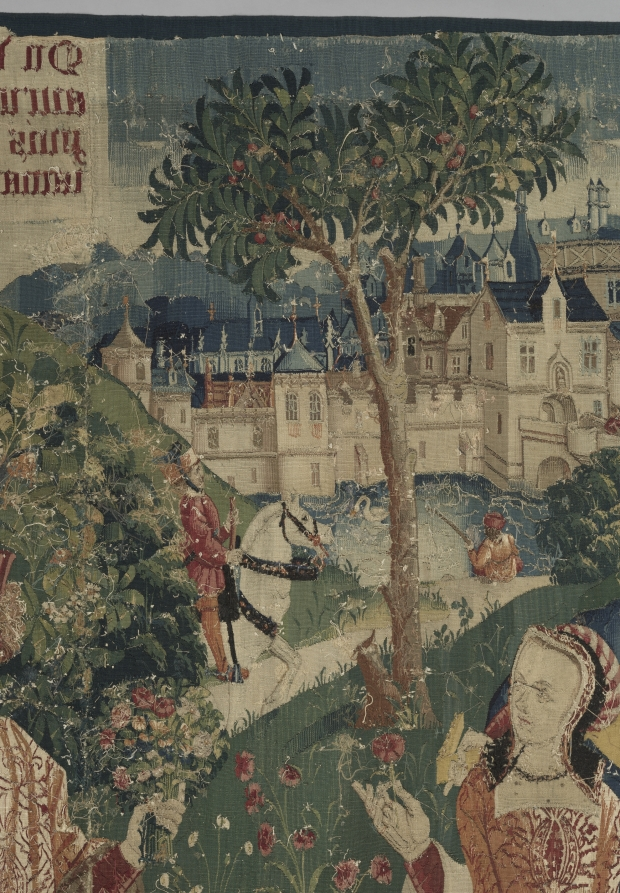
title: Time (from Chateau de Chaumont set)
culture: France, Lyon(?), early 16th century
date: 1512–15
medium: silk and wool; tapestry weave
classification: Tapestry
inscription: French verse in Gothic letters translates as follows: "One sees the weather adorned in green, Sometimes as pleasing as an angel; To suddenly change and be quite strange, The weather never stays the same."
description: Pierre Sala, who likely commissioned the set, is portrayed as the richly attired central figure offering a bouquet, a symbol of knowledge, to Éléonore, his daughter. Éléonore is pregnant, revealed by her upturned skirt and the persimmon in her husband Hector’s hand. Hector’s mother, Marguerite, in dark attire, will wed the widowed Sala in 1519. They appear in front of the royal chateau of Blois. The figures at the right convey Sala’s advice to his children. Time (the old man with the staff) with Clio, the Muse of History, standing on his shoulders, is being attacked by a Herculean youth wielding a stick. With this allegory, Sala is explaining that youth is ignorant of the complexities of life and time. The small unicorn at the far right represents the soul. The verse in Old French at the top refers to changing time: One sees Time adorned with green foliage, Sometimes as pleasant as an angel, Then suddenly change and become quite strange. Never does Time persist in one state.